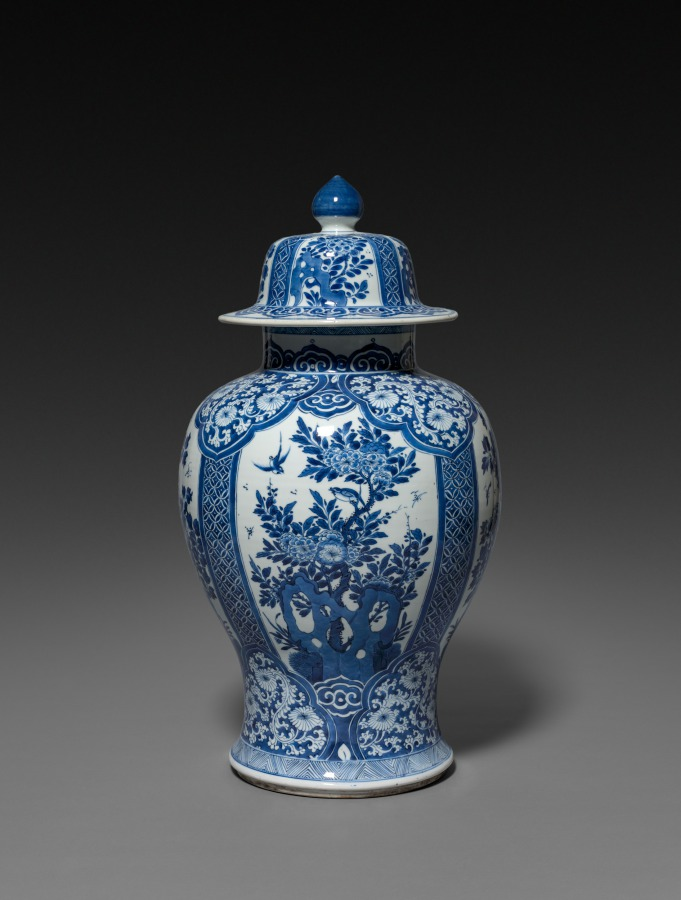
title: Vase with Cover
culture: China, Jiangxi province, Jingdezhen kilns, Qing dynasty (1644–1911), Kangxi reign (1662–1722)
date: 1662–1722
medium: porcelain with underglaze blue decoration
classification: Ceramic